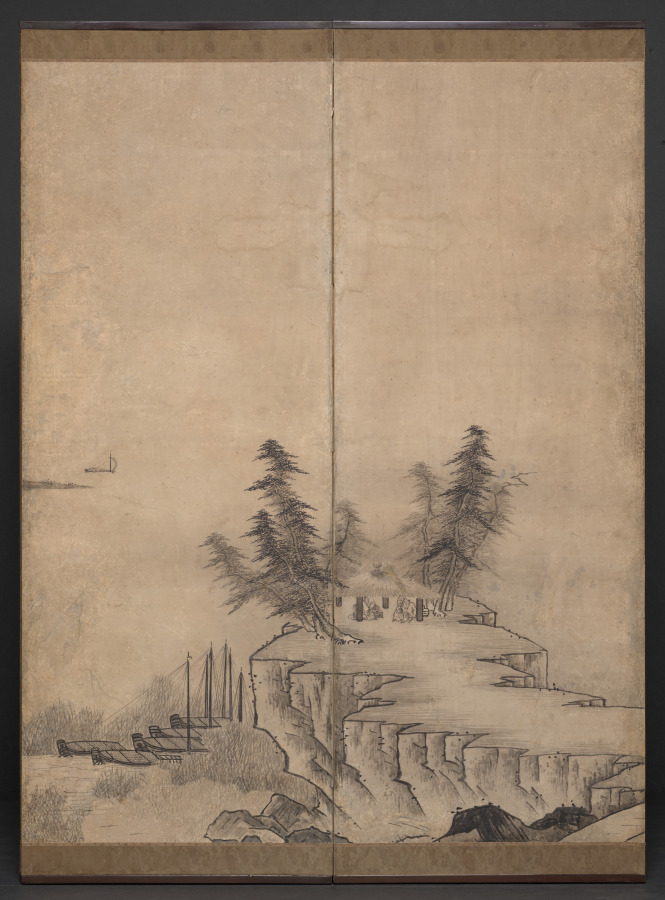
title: Chinese Pavilions in a Landscape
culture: Japan, Edo period (1615–1868)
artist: Unkoku Tōeki (Japanese, 1591–1644?)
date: 1600s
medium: Six-panel folding screen, ink and light color on paper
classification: Painting